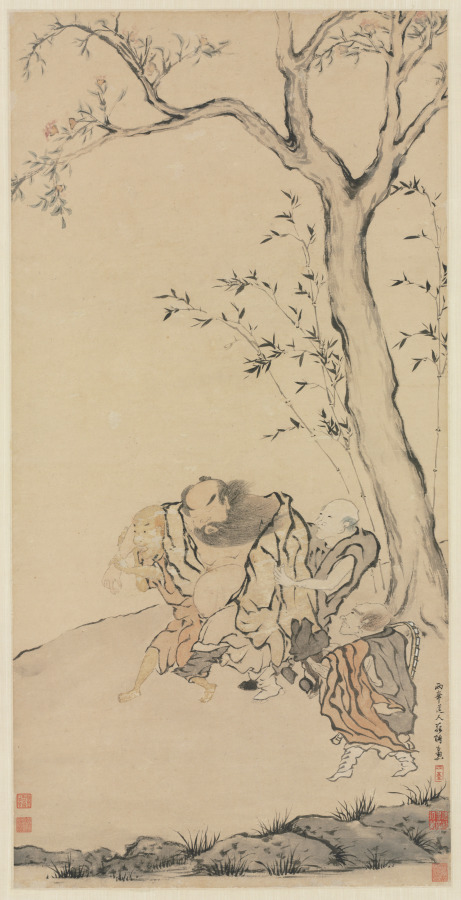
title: Zhong Kui Supported by Ghosts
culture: China, Qing dynasty (1644–1911)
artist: Luo Ping (Chinese, 1733–1799)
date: 1700s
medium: hanging scroll; ink and light color on paper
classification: Painting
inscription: 兩峰道人羅聘畫 【印】 兩峰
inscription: 4 additional seals: 3 of Dai Zhi 戴植 (19th c.); 1 of Ren Bonian 任伯年 [Ren Yi 任頤] (1840–1895)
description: In popular belief, Zhong Kui is a powerful guard against evil spirits, particularly on New Year’s Day and at the Double-Fifth Festival, on the fifth day of the fifth lunar month, when his image is displayed in households to prevent diseases and other misfortunes.